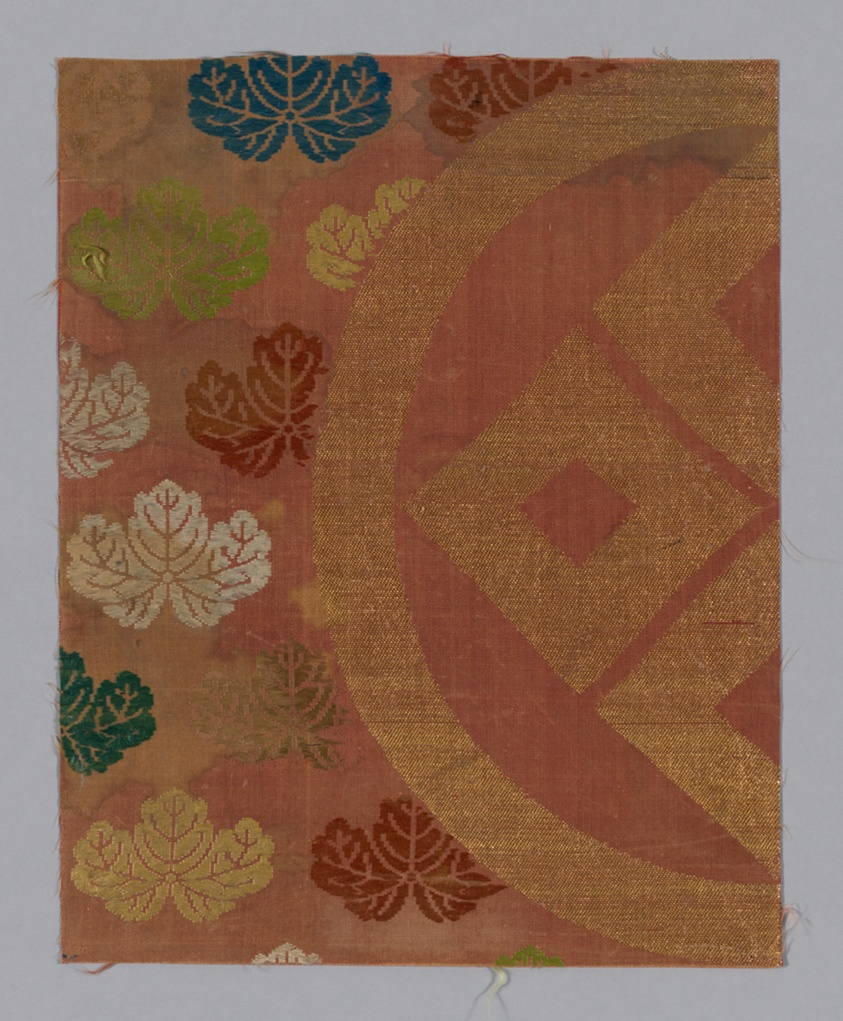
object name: Textile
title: Fragment (from Noh Costume)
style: edo (japanese period)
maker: Japan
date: Edo period (1615– 1868), 1675/1725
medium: Brocaded twill (kara ori) silk and gilt paper; 2 1/2 strips to m.m.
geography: Japan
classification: weaving; textile